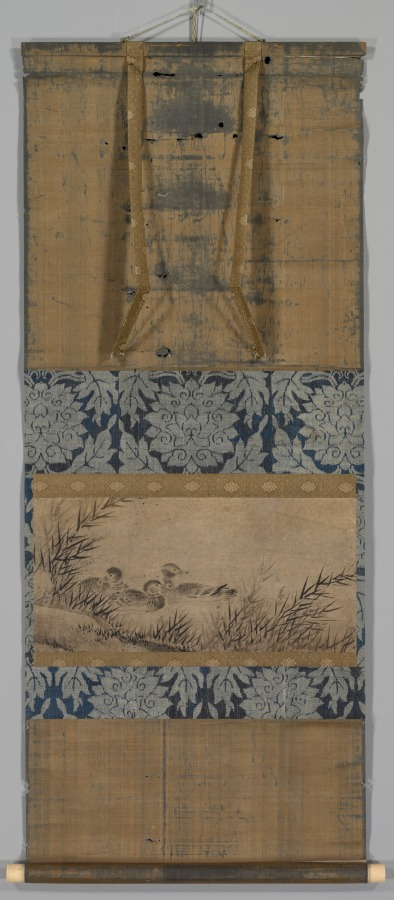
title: Ducks and Reeds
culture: Japan, Momoyama period (1573-1615) to Edo period (1615-1858)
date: early 1600s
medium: hanging scroll; ink on paper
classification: Painting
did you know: This painting was produced by a member of the Kano school.